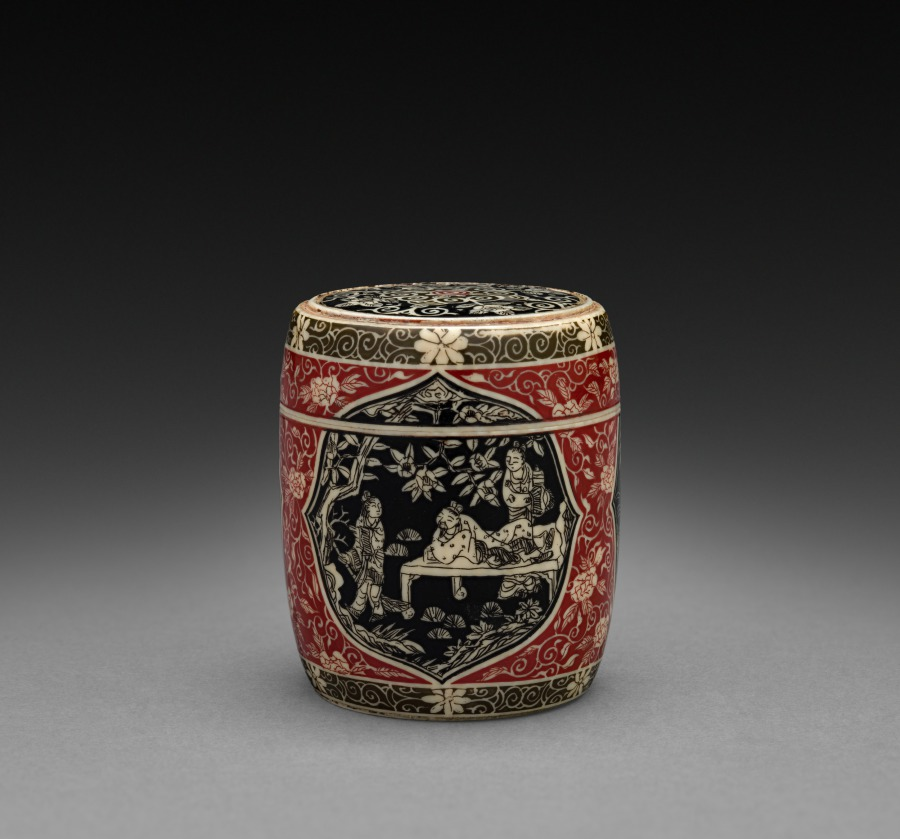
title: Miniature Garden Seat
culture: China, Qing dynasty (1644-1911), Qianlong mark and reign (1736-95)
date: late 1700s–early 1800s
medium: ivory with pigments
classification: Ivory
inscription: 乾隆貢器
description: In the Qing dynasty (1644–1911), luxury items became more affordable to larger parts of the society, including women, merchants, and literati in non-official positions. Imperial patronage and a growing urban population encouraged consumption of luxury goods and local craftmanship. This ivory carved and painted to resemble a miniature garden seat illustrates the superb skills and the creative mind of the talented artisans who sought clients on a competitive market.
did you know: A servant carrying a qin, zither, accompanies two gentlemen admiring the trees.